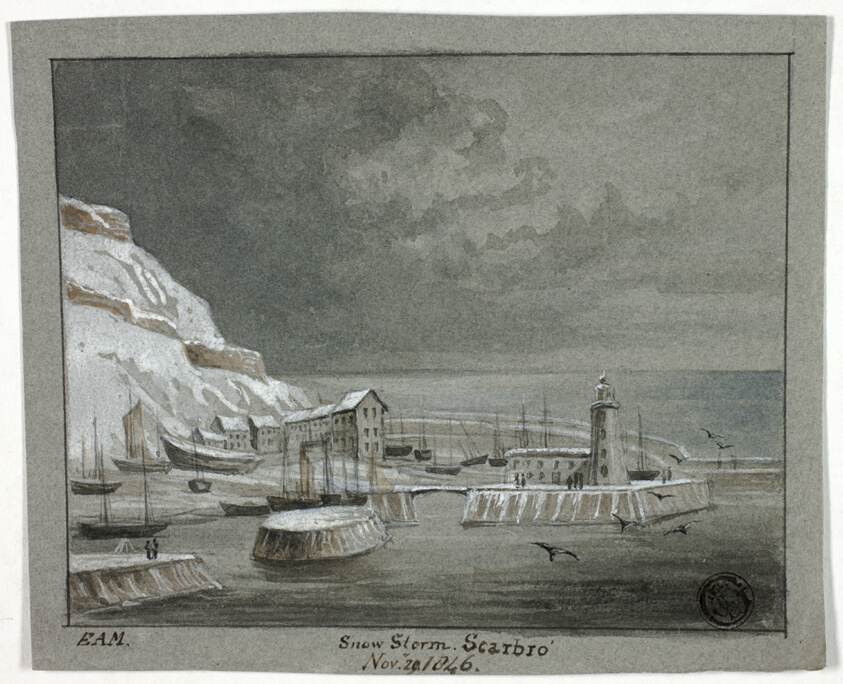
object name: Drawing and Watercolor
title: Snow Storm, Scarbro'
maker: Elizabeth Murray (English, c. 1815-1882)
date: November 29, 1846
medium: Brush and brown and gray wash, heightened with white gouache, on gray wove paper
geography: England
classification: ink or chalk wash; drawings (visual works); prints and drawing